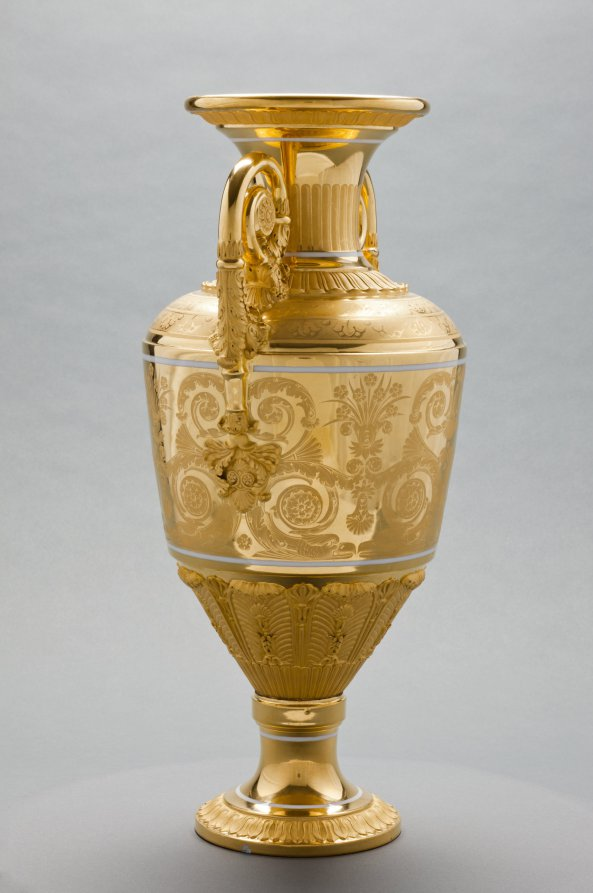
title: Vase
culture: Russia, St. Petersburg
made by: St. Petersburg Imperial Porcelain Factory (Russian)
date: c. 1820–1830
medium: gilt porcelain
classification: Ceramic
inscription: inscribed: "Moreau" in gold near lip.